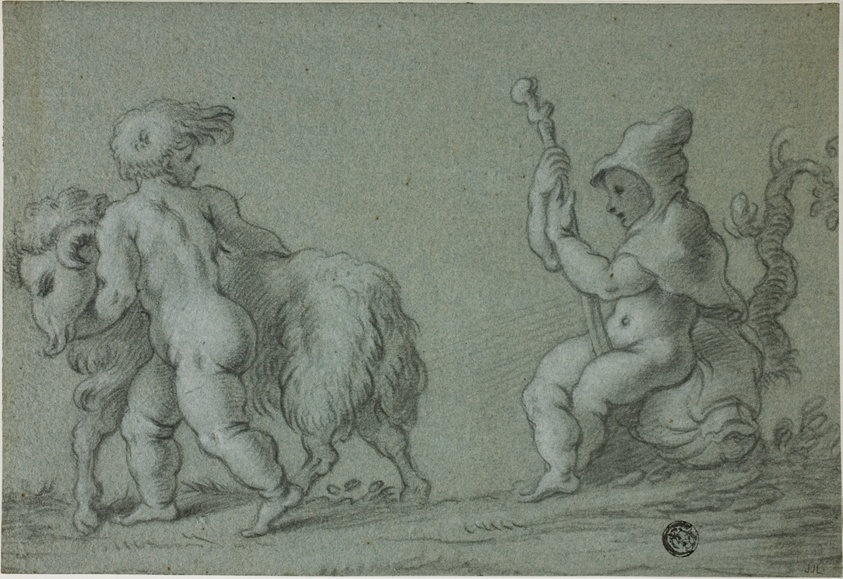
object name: Drawing and Watercolor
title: Putti as Goatherds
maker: Unknown artist; possibly Flemish, 18th century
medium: Black and white chalk on blue laid paper, laid down on ivory laid paper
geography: Flanders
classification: chalk; drawings (visual works); prints and drawing